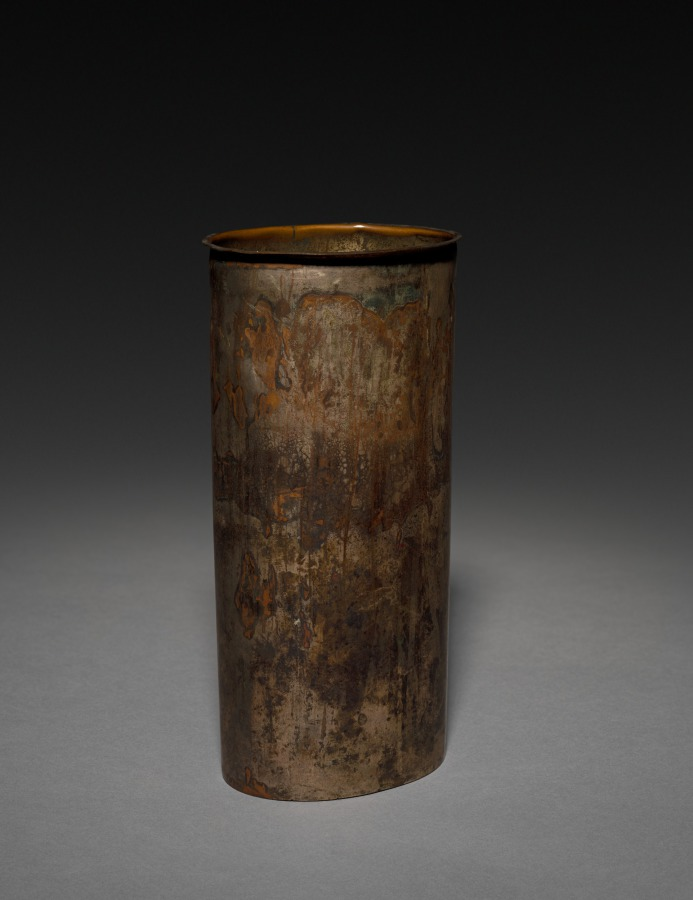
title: Vase (liner)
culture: Japan, Edo period (1615–1868) to Meiji period (1868–1912)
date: 1800s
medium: tin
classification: Ivory